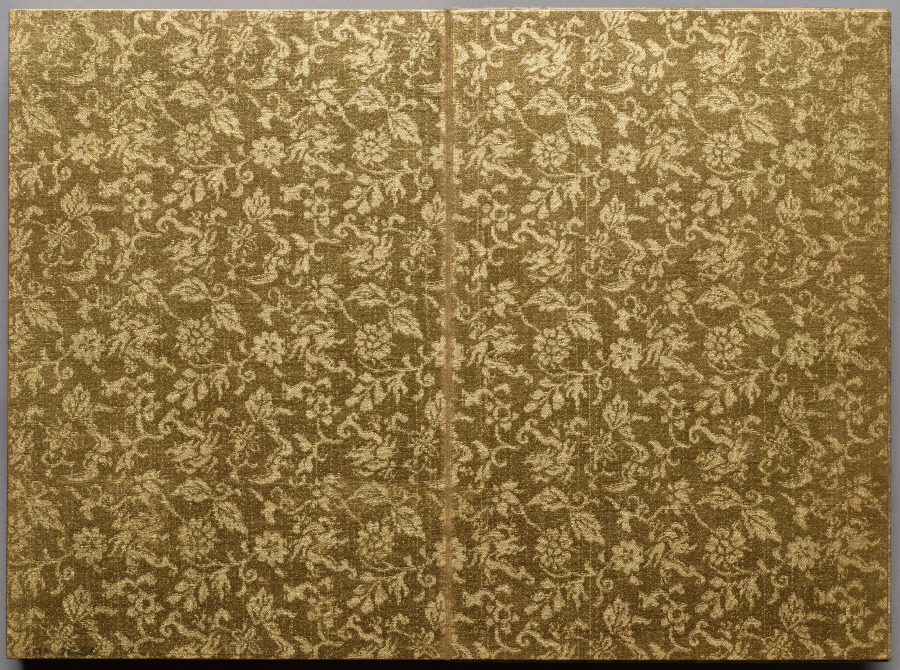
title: Flowers and Grasses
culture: Japan, Edo period (1615–1868)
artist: Tsubaki Chinzan (Japanese, 1801–1854)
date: 1841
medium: folding-album with six leaves of paintings; preface in ink on paper; paintings in ink and color on silk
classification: Bound Volume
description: This album contains six small paintings, each of which takes a different plant as its subject. The paintings include depictions of pomegranates, as well as flowering narcissus and orchid.